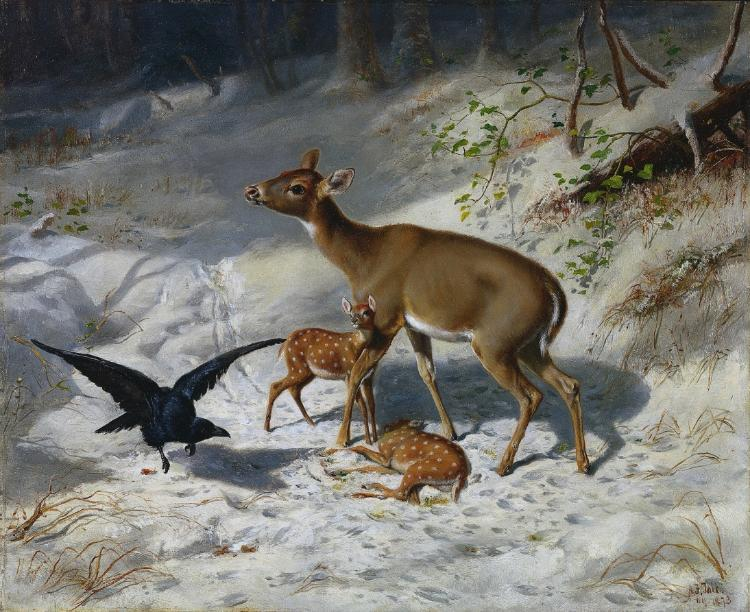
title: Maternal Solicitude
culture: America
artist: Arthur Fitzwilliam Tait (American, born England, 1819–1905)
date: 1873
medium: oil on wood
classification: Painting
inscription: Signed lower right: "A. F. Tait. . / N.Y. 1873"; inscribed on the back: " 'Maternal Solicitude' (The Dying Fawn)"